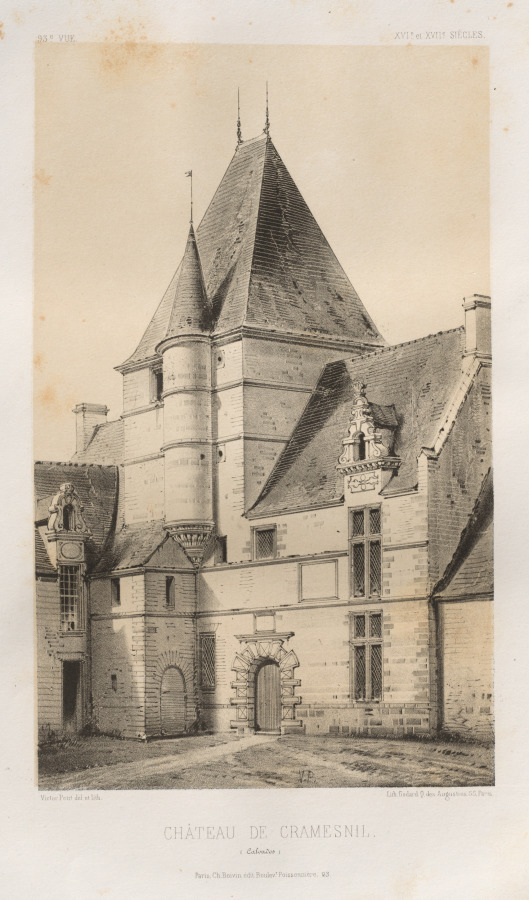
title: Architecture Pittoresque ou Monuments des XVeme. Et XVIeme. Siecles: Chateaux de France des XV et XVI Siecles: Pl. 93, Château de Cramesnil (Calvados)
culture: France, 19th century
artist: Victor Petit (French, 1817–1874)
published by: Charles Boivin (publisher and editor); Lith de Godard a Paris (printer)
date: 1860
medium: lithograph with tint stone, from portfolio of 100 lithographs with tint stone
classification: Print